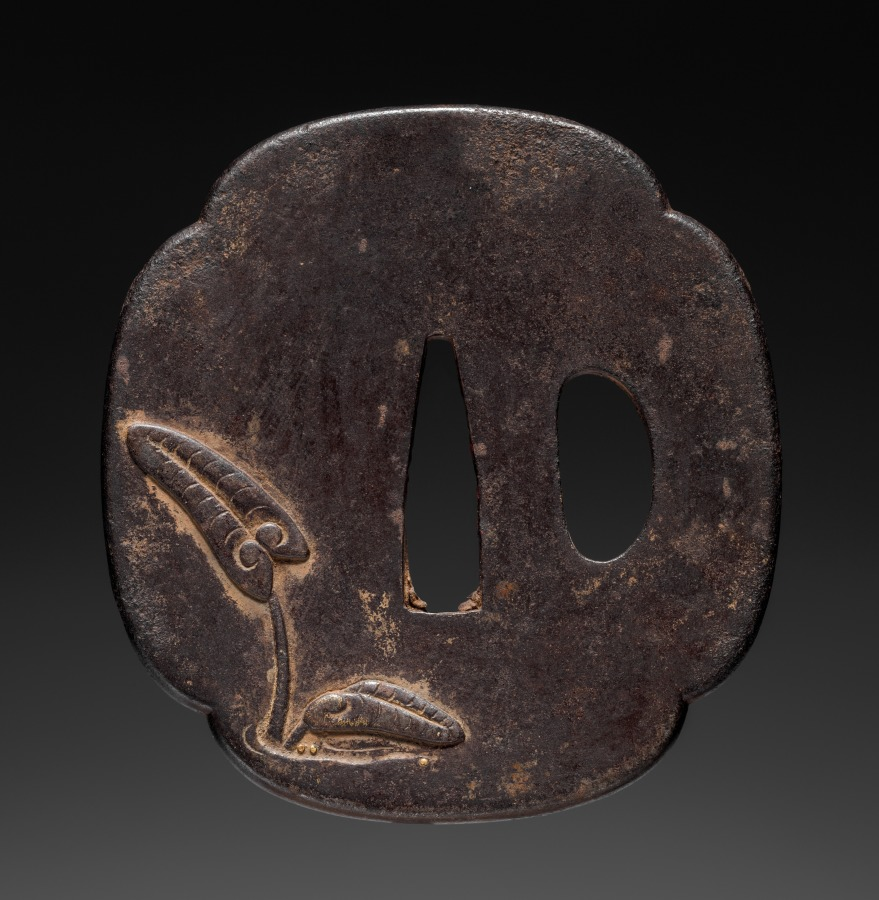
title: Sword Guard (Tsuba)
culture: Japan, possibly Edo period (1615-1868)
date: c. 1615–1868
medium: iron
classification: Arms and Armor